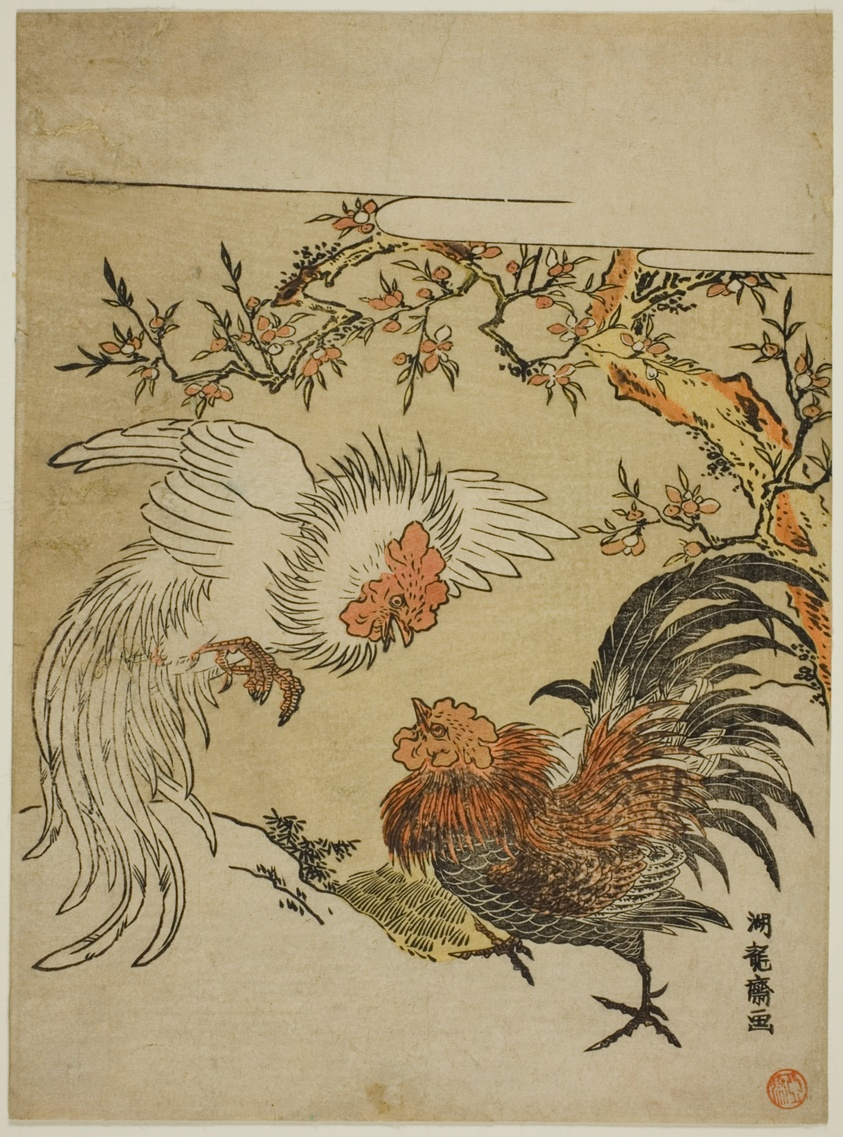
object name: Print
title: Cocks Fighting Under a Tree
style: Japanese (culture or style)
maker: Isoda Koryusai (Japanese, 1735-1790)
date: c. 1770s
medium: Color woodblock print; chuban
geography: Japan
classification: woodblock print; print; asian art